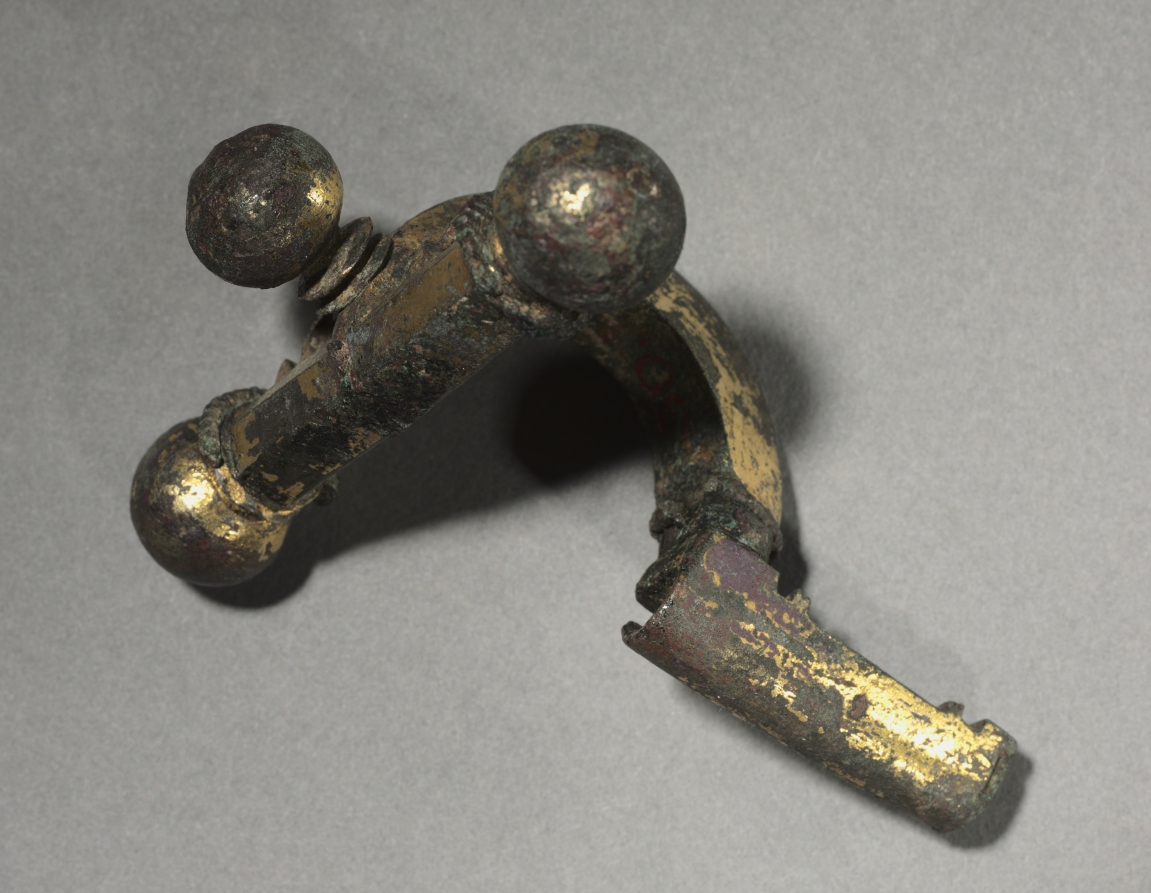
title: Crossbow Fibula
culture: Gallo-Roman or Romano-British, Migration period, 4th century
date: c. 350–400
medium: bronze, gilt-bronze, silver, and niello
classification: Jewelry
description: A fibula was a garment clasp that functioned somewhat like a modern safety pin. Since buttons were not used in antiquity, fibulae were used to keep a cloak closed. They were worn by both men and women, commonly on the right shoulder, and produced in various sizes and shapes. Because they were highly visible accessories, they often received decorative gilding, inlay decoration, or "onion"- shaped domes. Crossbow fibulae were introduced by the Romans and are named for their resemblance to the weapon. Decorative and technical features of this group suggest they may have been made in Roman-occupied Britain.